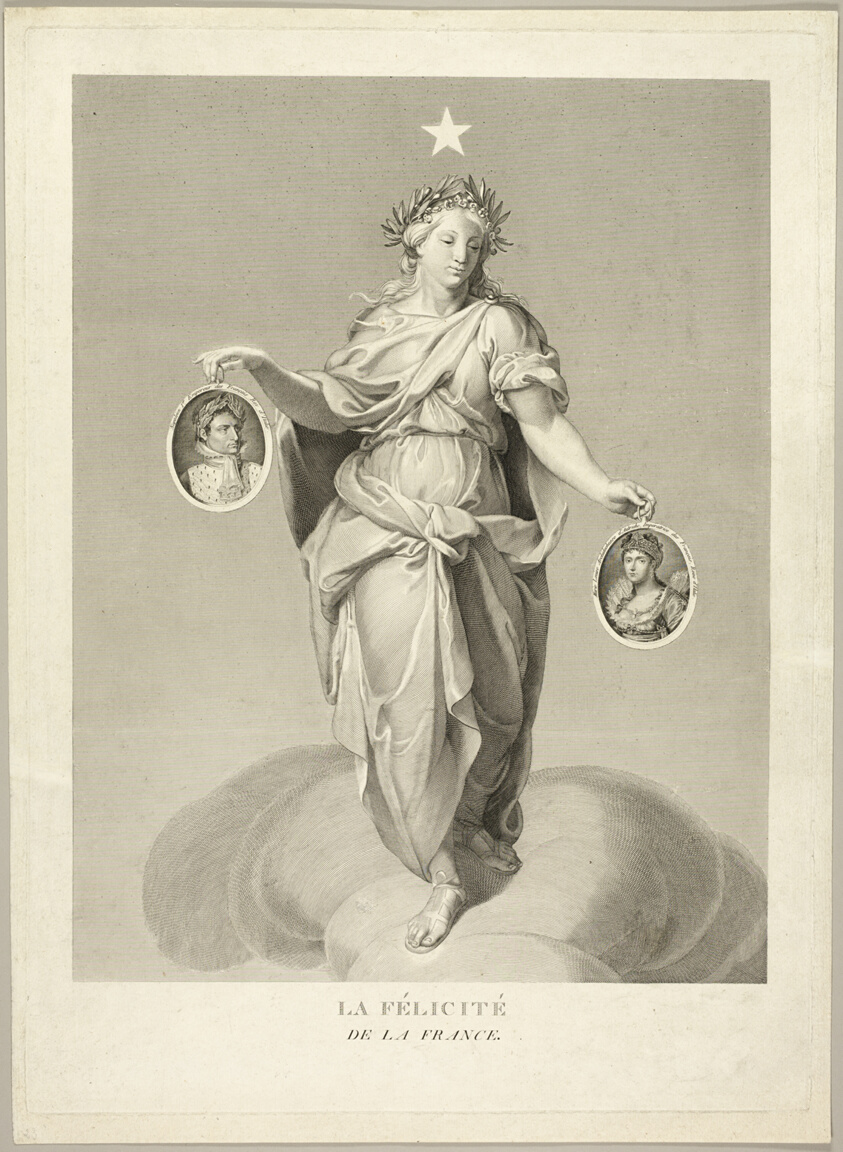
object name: Print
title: Felicity of France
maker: Unknown Artist; French, early 19th century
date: 1810/14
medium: Engraving with etching in black on ivory laid paper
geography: France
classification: engraving; print; prints and drawing